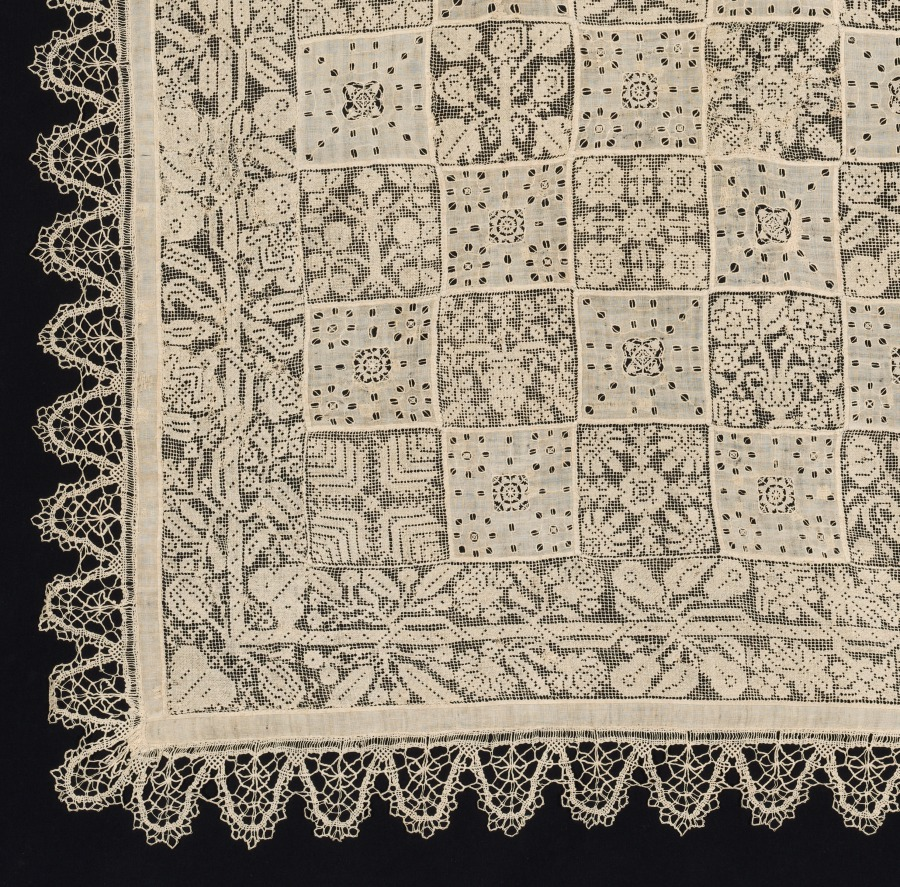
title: Cloth with One Figure of a Woman Carrying a Cross Surrounded by Floral and Vegetal Patterns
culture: Italy, 1700s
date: 1700s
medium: Bleached linen (est.): needle lace, filet/lacis (knotted ground and darned in two directions), alternating reticella squares (open cutwork) and bobbin lace edging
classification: Lace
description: The only figure represented on this large lace cloth is located in the center. The figure is a woman, shown in profile, carrying a cross, standing on top of a creature or within a vessel shaped like a creature.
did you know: The large size and square shape suggest that this textile would likely have been used as a table cloth.